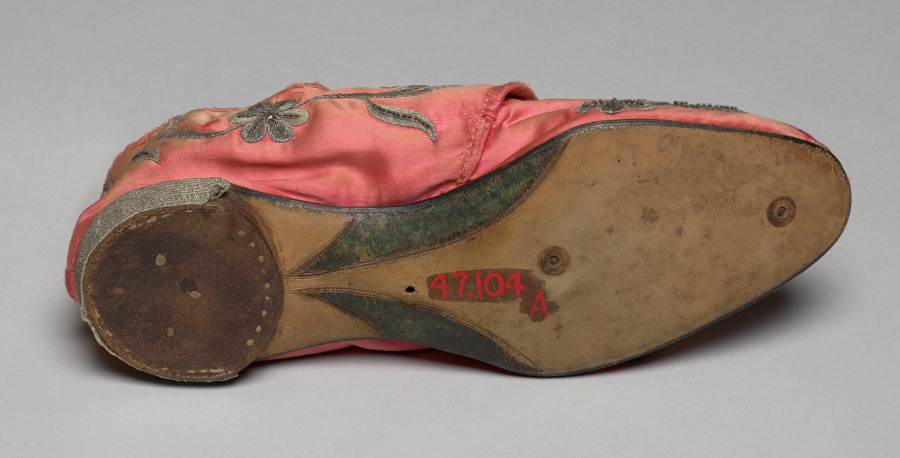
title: Slipper (one of a pair)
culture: Italy, Venice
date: early 1700s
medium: Silk: satin weave with silver metal thread embroidery and trim; spangles; leather soles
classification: Garment